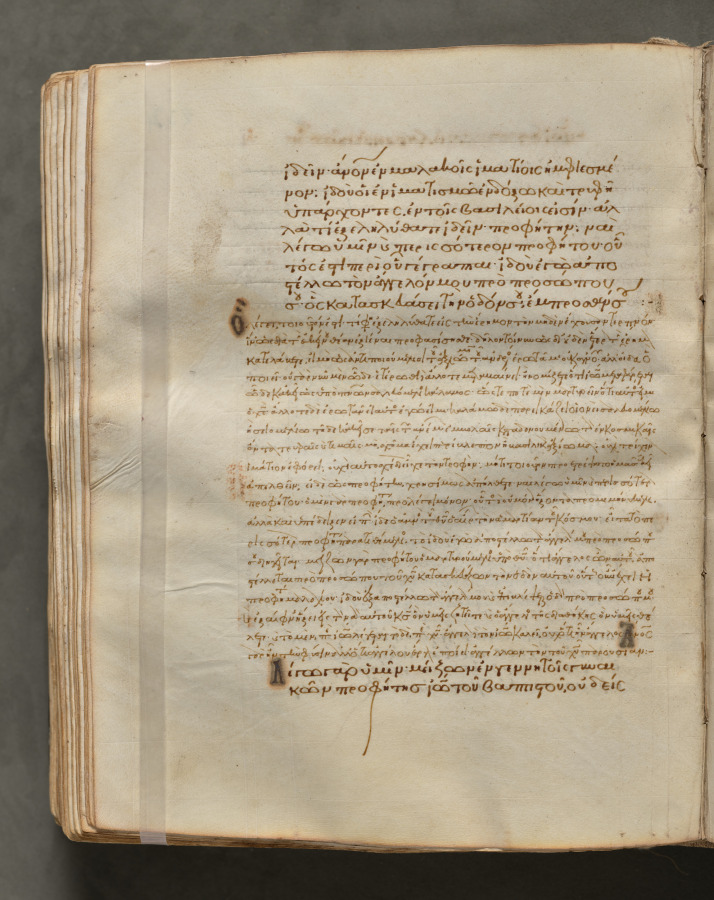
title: Text, folio 234 (verso), from a Gospel Book with Commentaries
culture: Byzantium, Constantinople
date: c. 1000–1100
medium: ink, tempera, and gold on vellum; leather binding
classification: Bound Volume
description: Each of the four gospels in this book opens on a page with brilliantly illuminated borders depicting the author of the text as well as birds—principally peacocks, symbols of the immortality of the soul—and fountains, representing the fountain of life and the salvation of the soul. This volume consists of 428 leaves with texts in Greek. Its level of sophistication suggests that it was probably written and decorated in a monastery in Constantinople.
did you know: Gospel books were carried in procession through Byzantine churches.